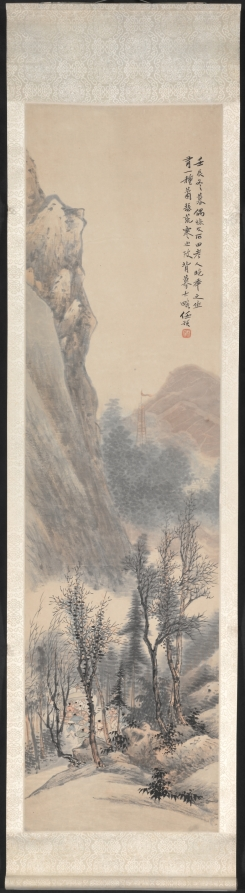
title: Landscape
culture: China, Qing dynasty (1644-1911)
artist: Ren Yu (Chinese, 1853–1901)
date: 1892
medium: Hanging scroll; color on paper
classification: Painting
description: This seasonal landscape is from a set of four hanging scrolls by Ren Yu. He was the youngest, most eccentric, and least prolific of the Four Rens, a family of prominent painters in Shanghai during the late Qing dynasty (1644–1911). Perhaps due to his opium habit and subsequent financial difficulties, Ren Yu tended to be lackadaisical in his work. The few remaining high-quality paintings hint at his artistic potential lost to opium. Though Ren’s premature death left his artistic promise unfulfilled, his paintings were acquired and donated to the museum by Charles Lang Freer (1854–1919), a wealthy businessman and art collector from Detroit. As Freer had hoped, this donation of Ren Yu paintings inspired the young Cleveland Museum of Art to continue to expand its own Chinese painting collection.